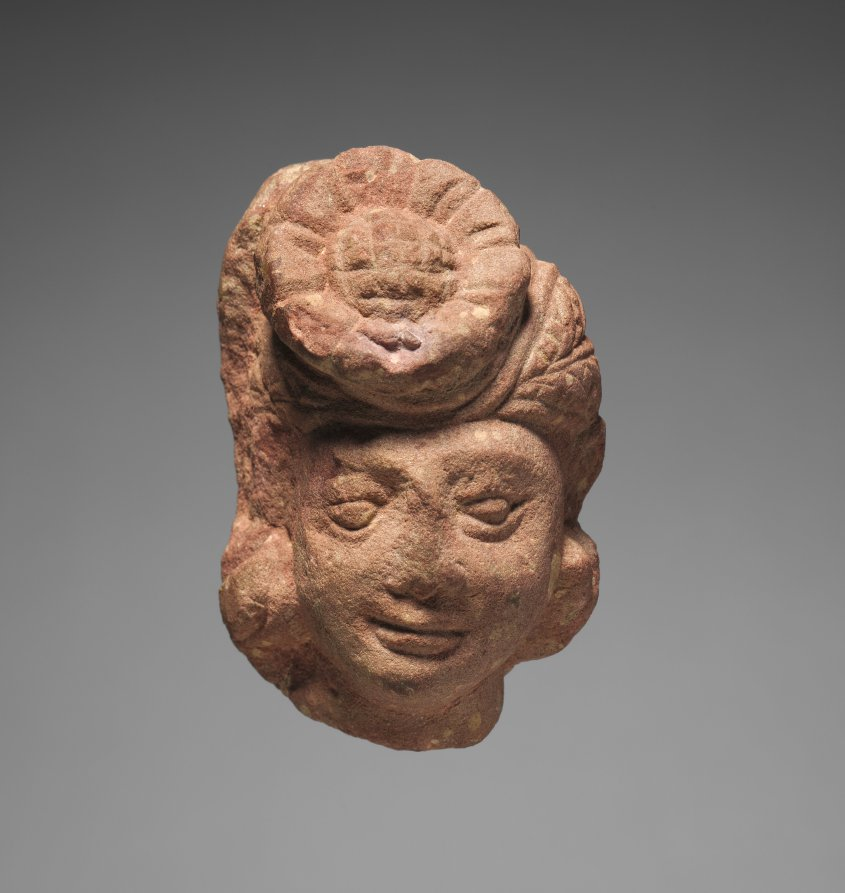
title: Miniature Head of a Bodhisattva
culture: India, Mathura, Kushan period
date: 1–100 CE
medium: red Sikri sandstone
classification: Sculpture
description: Against the backdrop of the large-scale monumental sculpture for which the Mathura school is noted, this miniature head may appear insignificant. However, it exemplifies on a much reduced scale the qualities of style and execution that parallels developments on monumental sculpture. It also reflects a certain freedom of treatment of facial details that clearly denotes that while the artist worked in a minor key, the creation was neither inconsequential nor a sequacious rendering of the major sculptural trends of large-scale sculptures from Mathura. Although this head is small, a sense of volume and mass is conveyed by the bulky earrings, the protruding flowerlike cockade of the turban, and the reduction of linear detail in defining these ornaments and the facial areas. The unridged brows, the generous curves of the jawline and neck, and the soft modulations of the chin and cheeks belie the diminutiveness of the whole. At the same time, the large almond-shaped eyes and the compressed angularity of the upper lip individualize this pensive Bodhisattva head. The modeling and the turban type with the oversized cockade suggest it dates from the pre-Kaniska phase of the first-century sculptures from Mathura.